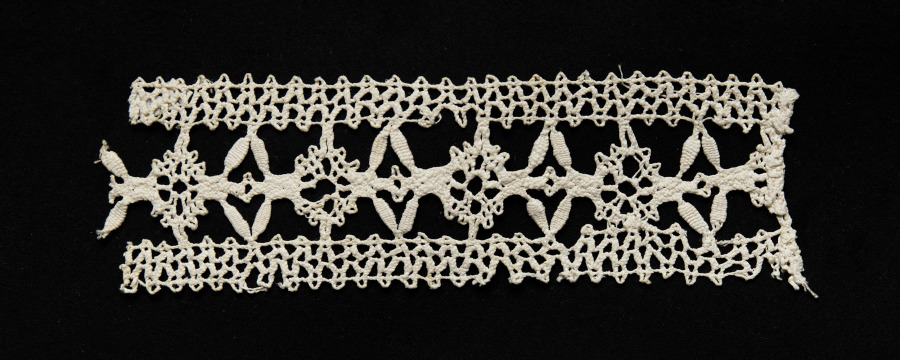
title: Lace Insertion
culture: Italy, Genoa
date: 1550–99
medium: Bobbin lace (needle lace, reticella design)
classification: Lace